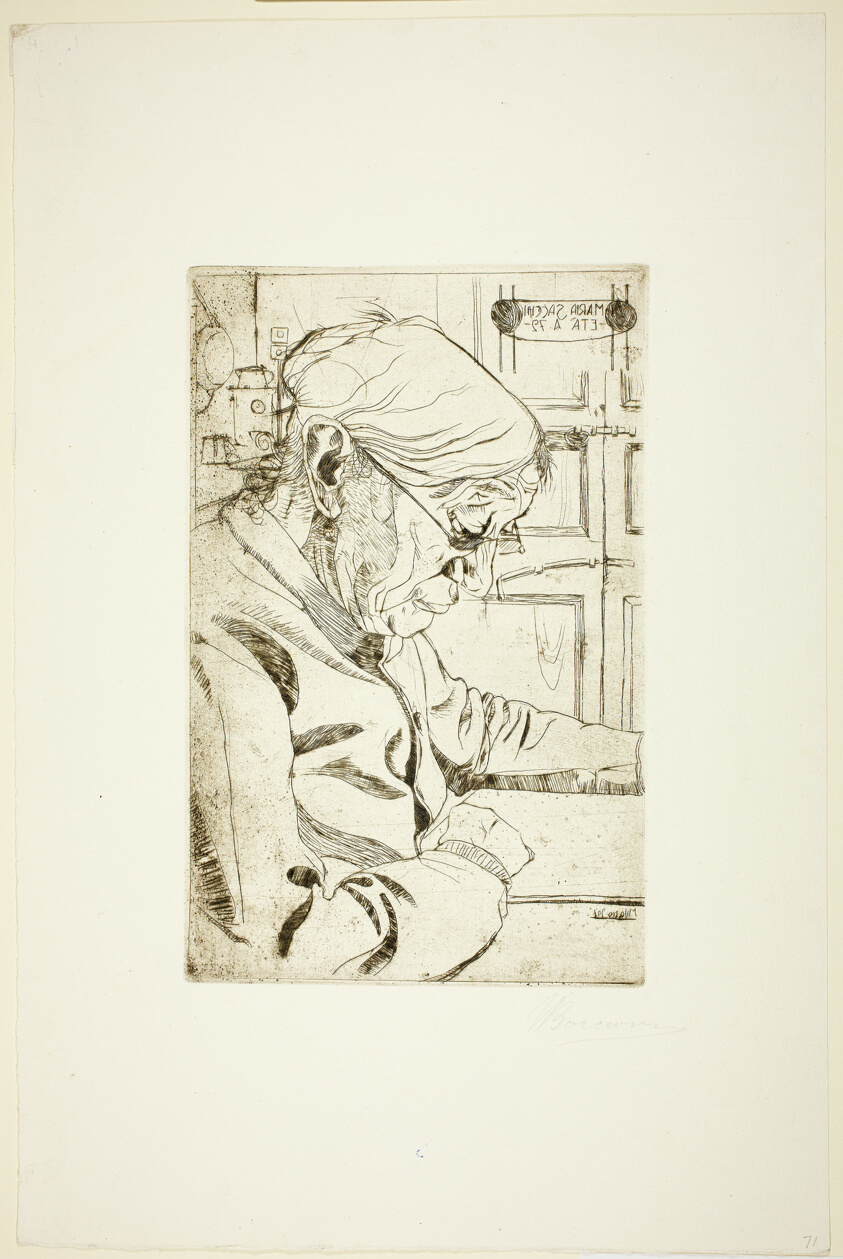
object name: Print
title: La Signora Sacchi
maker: Umberto Boccioni (Italian, 1882-1916)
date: 1907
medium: Drypoint on paper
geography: Italy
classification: drypoint; print; prints and drawing